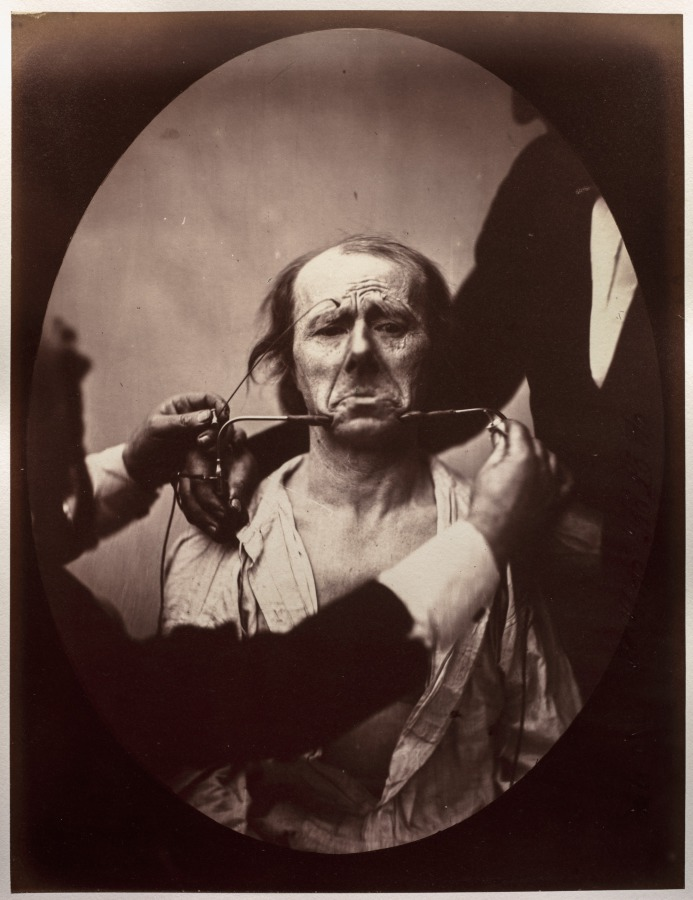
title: Figure 45: Contraction électrique forte des triangulaires des lèvres et des sourciliers: douleur et déspoir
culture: France, 19th century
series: Mécanisme de la physionomie humaine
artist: Guillaume-Benjamin-Amand Duchenne (de Boulogne) (French, 1806–1875)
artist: Adrien Tournachon (French, 1825–1903)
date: c. 1856, printed 1862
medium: Albumen print from glass plate negative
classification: Photograph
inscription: On the verso, lower left corner, in graphite, “fig. 7”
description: Duchenne embarked on the first scientific, systematic exploration of the physiology of human facial expression and hoped, through photographs of his experiments, to teach artists how to portray those emotions. The experiments were performed by applying electrical stimulation to a single muscle on one side of the face, so that the viewer could clearly see the impact of the muscular contraction.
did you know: Duchenne, a neurologist at a hospital for the poor in Paris, turned to photography to record the grammar of human expression.